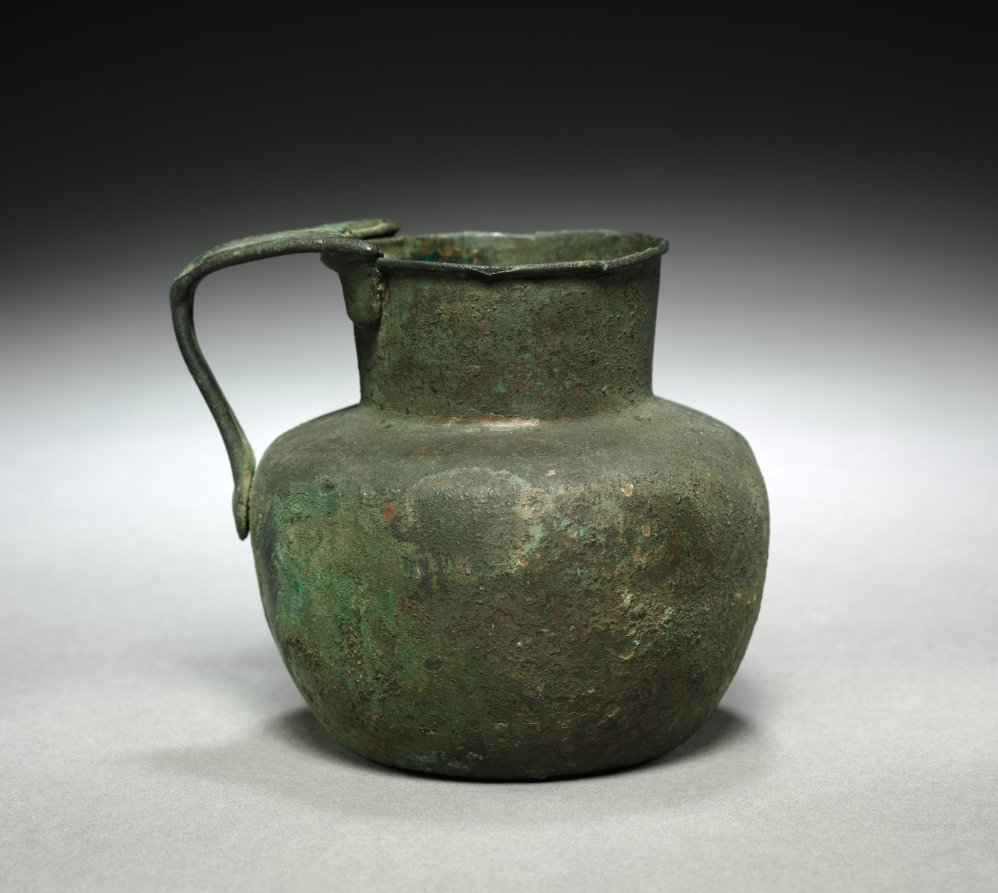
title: Jug or Pitcher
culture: Egypt, New Kingdom (1540–1069 BCE), Dynasties 18–19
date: 1350–1186 BCE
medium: bronze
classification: Vessels